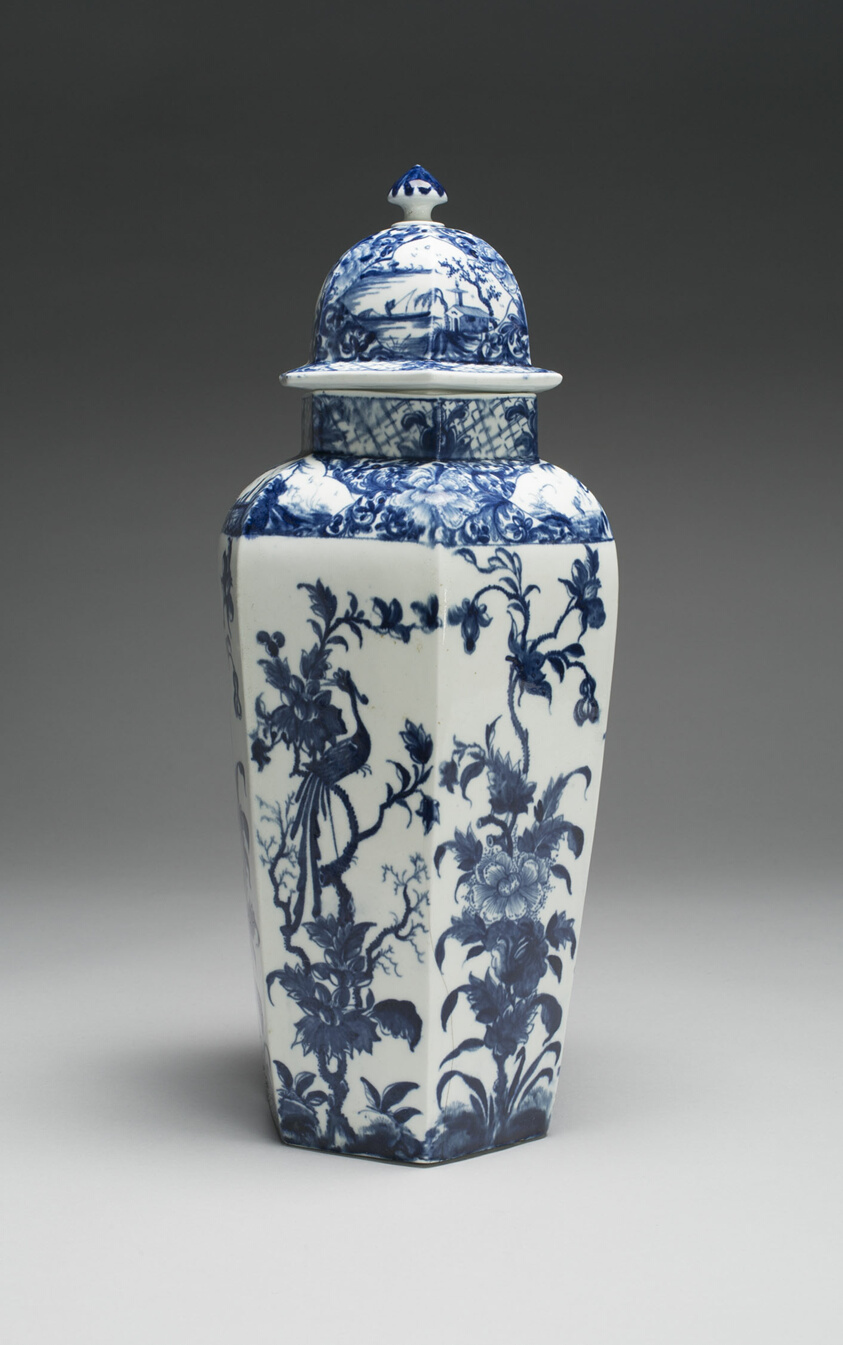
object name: Ceramics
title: Vase with Cover (one of a pair)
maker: Worcester Porcelain Factory (Warmstry House Period, 1751–1783); Worcester, England, founded 1751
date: c. 1760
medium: Soft-paste porcelain with underglaze blue decoration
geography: Worcester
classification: vase; vessel; porcelain; ceramics; european decorative arts